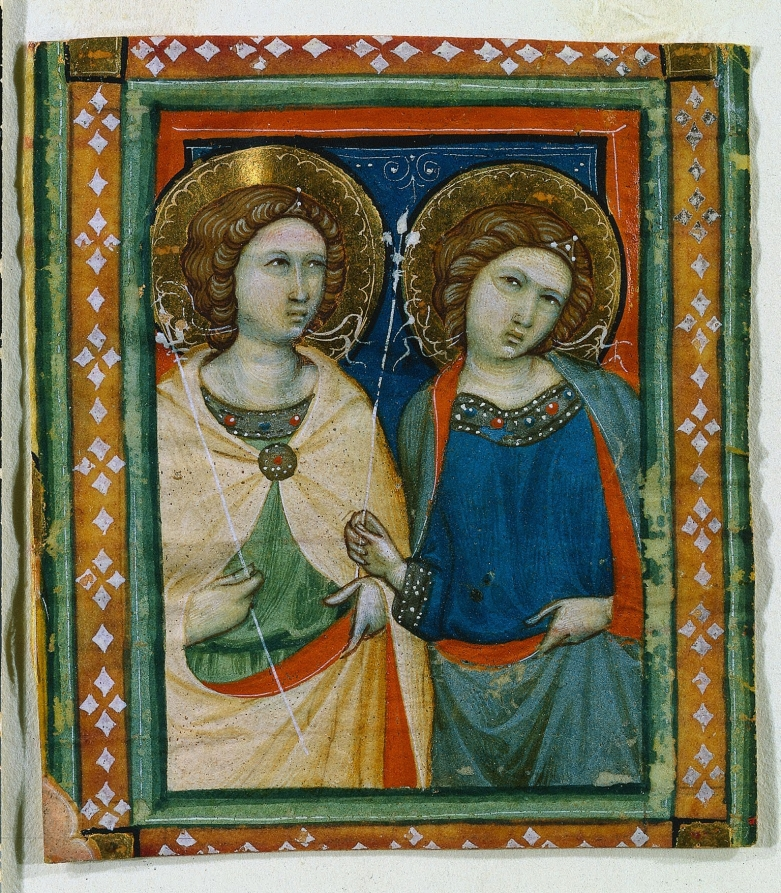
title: Illumination Excised from a Choir Book: Two Female Angels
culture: Italy, Siena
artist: Niccolo di ser Sozzo Tegliacci (Italian, Siena, active 1334–63)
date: c. 1332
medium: tempera and gold on parchment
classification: Manuscript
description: This miniature was taken from a choir book and shows two female figures. Their golden halos mark them as saints and the lily scepters as virgins. It is attributed to the Sienese painter Niccolò di ser Sozzo. Although more than half of the population of Siena is said to have died of the plague, the city’s finances recovered quickly. In the arts, however, there is a continuation of the traditions of the first half of the century, of which Niccolò is a characteristic representative. It is therefore often difficult to decide whether a work was created before or after the plague wave.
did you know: Niccolo di ser Sozzo Tegliacci was one of the leading panel painters and miniaturists working in Siena. His father is believed to have also been an illuminator although he was a little known.